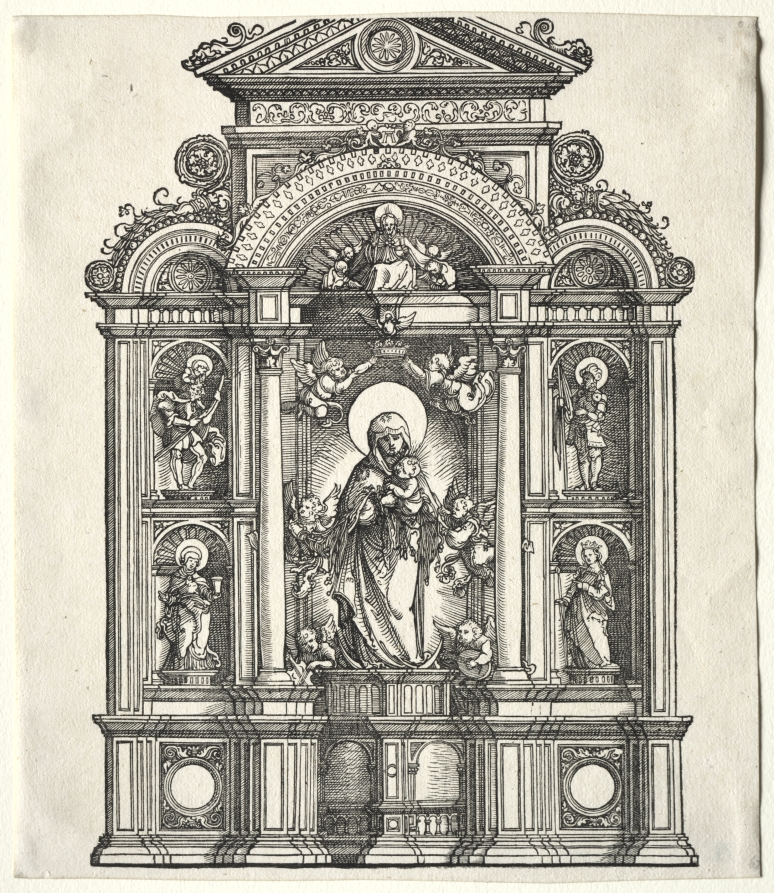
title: Great Altar with the Virgin, in a border with SS. Christopher, George, Barbara, Catherine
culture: Germany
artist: Albrecht Altdorfer (German, c. 1480–1538)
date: 1520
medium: woodcut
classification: Print